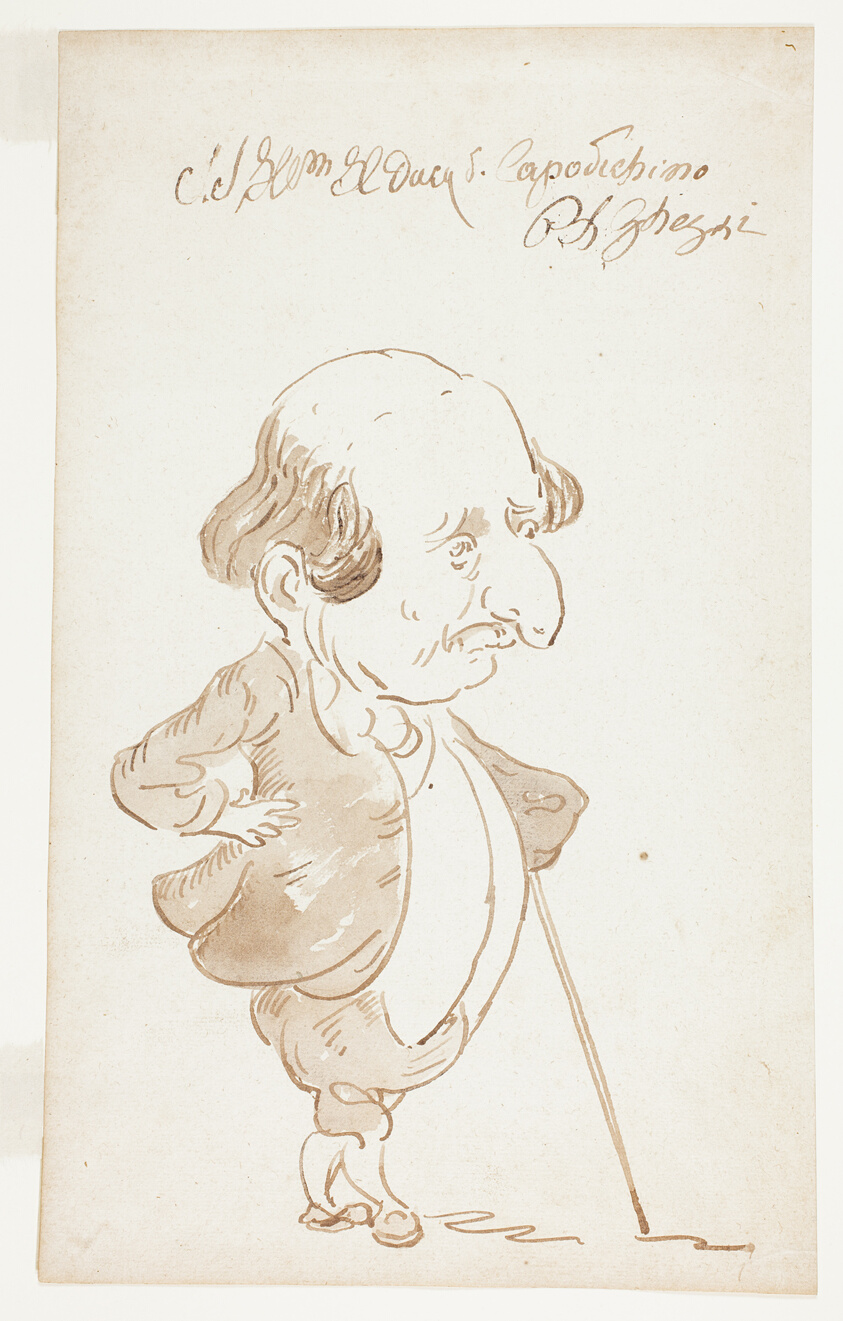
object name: Drawing and Watercolor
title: The Duke of Capodichino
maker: Attributed to Pier Leone Ghezzi; Italian, 1674-1755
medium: Pen and brown ink, with brush and brown wash, on ivory laid paper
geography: Italy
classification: pen and ink drawings; drawings (visual works); prints and drawing